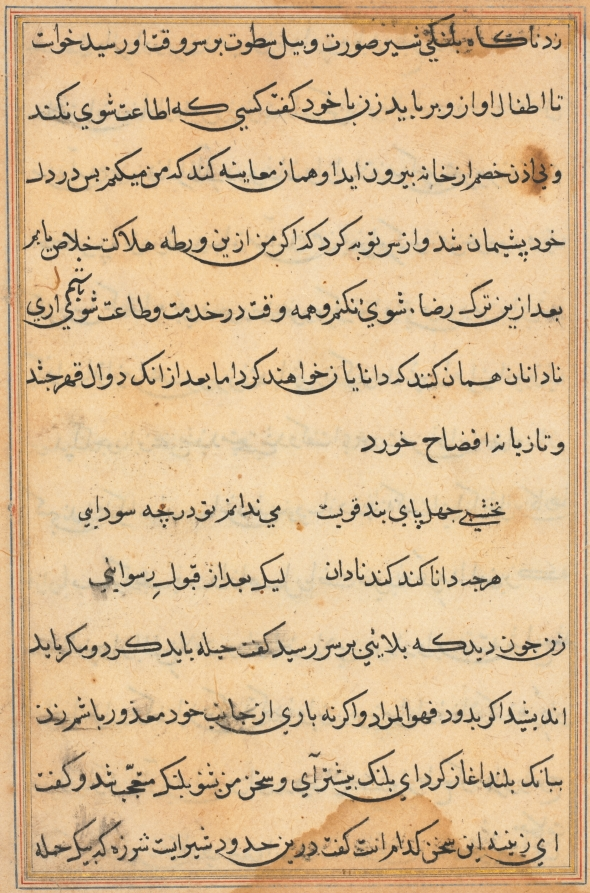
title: Page from Tales of a Parrot (Tuti-nama): text page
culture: Mughal India, court of Akbar (reigned 1556–1605)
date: c. 1560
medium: gum tempera, ink, and gold on paper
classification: Painting